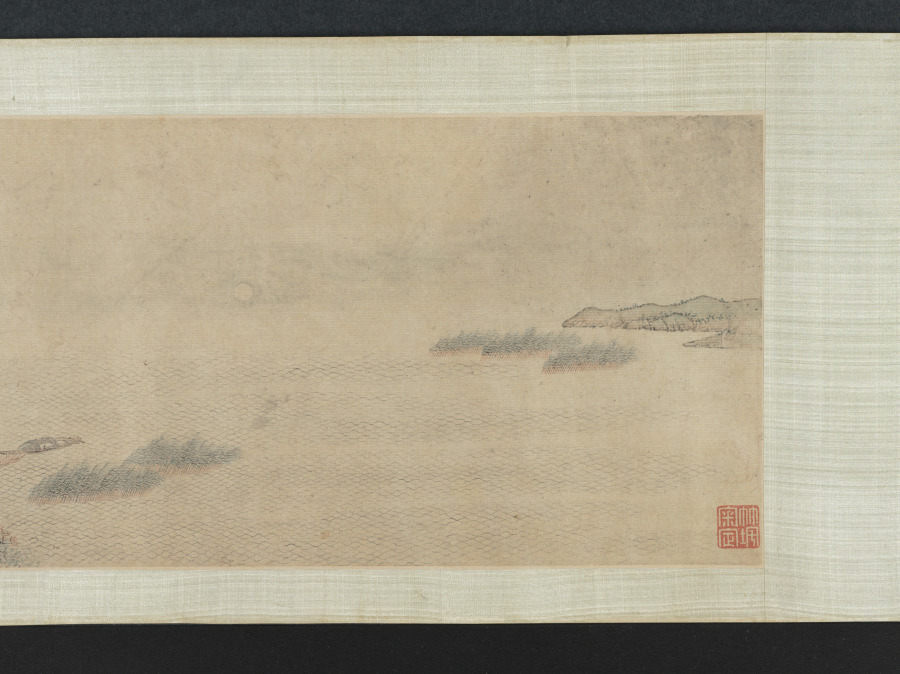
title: Saying Farewell at Xunyang (Song of the Pipa)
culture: China, Ming dynasty (1368–1644)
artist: Wen Boren (Chinese, 1502–1575)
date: 1500s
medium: handscroll, ink and color on paper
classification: Painting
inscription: "潯陽送客圖" 五峰山人文伯仁寫于停雲館中 [印] 文伯仁; 五峰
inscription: 2 colophons and 9 additional seals: 1 transcription of "Pipa xing 琵琶行” (Song of Pipa) and 3 seals of Zhu Yizun 朱彜尊 (1629-1709); 2 seals of Wu Rongguang 吳榮光 (1773-1843); 1 colophon, dated 1826, and 3 seals of Wu Xijia 吳錫嘉 (mid-1700s)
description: This handscroll depicts The Song of the Pipa, a poem by Bai Juyi 白居易 (772–846) written after the poet’s encounter with a pipa player on the Yangzi River. Expelled from her home city when her beauty and fame had faded, she played for the poet at night. Her musical performance and tragic life story resonated with Bai Juyi, who had just been demoted and exiled from life at court himself. The hazy, vast view and pale color tonalities of this painting illustrate these feelings of endless sadness, having lost one’s sense of purpose in life.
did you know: Wen Boren depicted the chilly autumn water with a fishnet pattern.